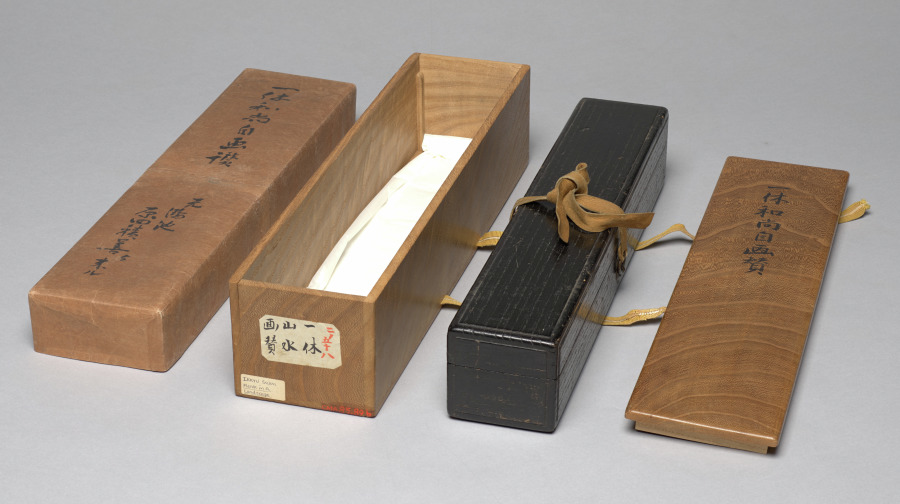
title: Listening to the Wind in the Pines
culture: Japan, Muromachi period (1392–1573)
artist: Ikkyū Sōjun (Japanese, 1394–1481)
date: 1400s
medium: hanging scroll; ink on paper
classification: Painting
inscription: 山居僧聴松風/何須臨済徳山禅一箇住山/三十年公案工夫了畢後/長松風静罷参眠 (transcribed by Trevor Menders with Zheng Xiaoying 2017, revised by Osvaldo Mercuri 2021)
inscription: 紫野龍寶門客东海純一休老和尚畫と詩一筆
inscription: 落款 一休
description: A monk sits in contemplation below an overhang covered with pine. The poem, titled "Monk in the Mountains Listening to the Wind in the Pines," refers to two Chinese Chan (Zen) Buddhist monks active in the ninth century. It may be translated as follows: Why must the Zen of Rinzai (Linji Yixuan) and Tokusan (Deshan Xuanjian) reside in a single temple for thirty years? Once he's solved his kōan, (the monk) ends his practice and falls asleep in the quietness of the wind among the tall pines. (translated by Osvaldo Mercuri) According to an inscription following the poem, both painting and verse were done by an eminent Japanese Buddhist monk known for revitalizing the Kyoto temple Daitokuji.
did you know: The word mountain, appearing in the title to the poem on this painting, can also refer to a temple.